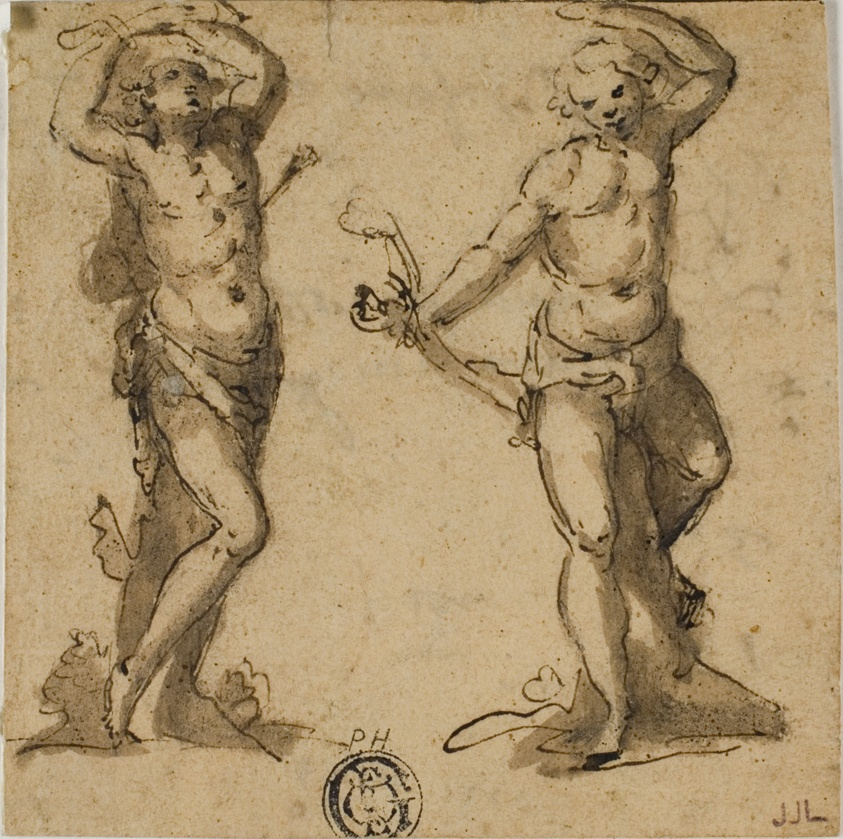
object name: Drawing and Watercolor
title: Two Sketches of Saint Sebastian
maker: Giovanni Battista Trotti (Italian, 1555-1619)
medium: Pen and brown ink, with brush and brown wash and traces of graphite, on tan laid paper, laid down on ivory laid paper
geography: Italy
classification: pen and ink drawings; paper; drawings (visual works); prints and drawing